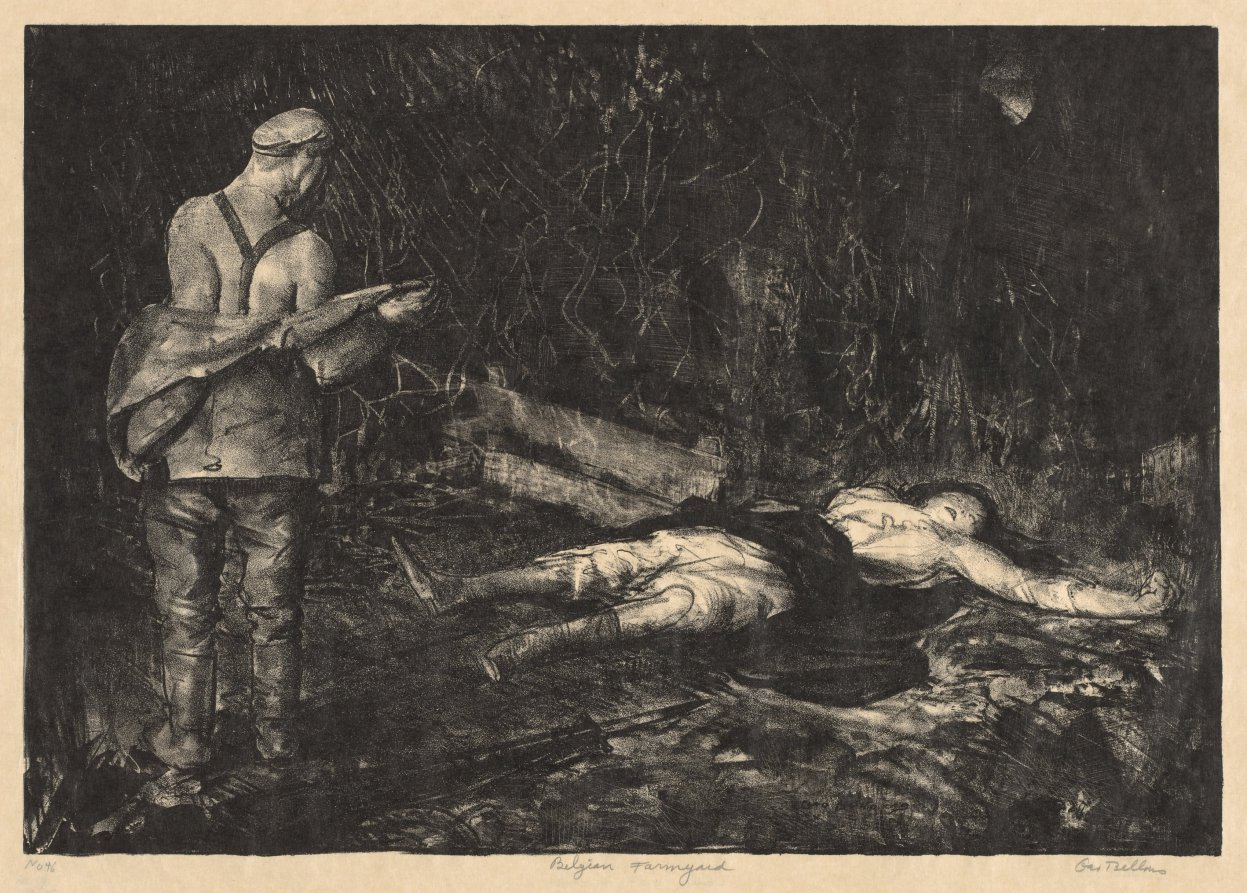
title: War Series: Belgian Farmyard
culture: America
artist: George Bellows (American, 1882–1925)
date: 1918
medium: lithograph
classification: Print